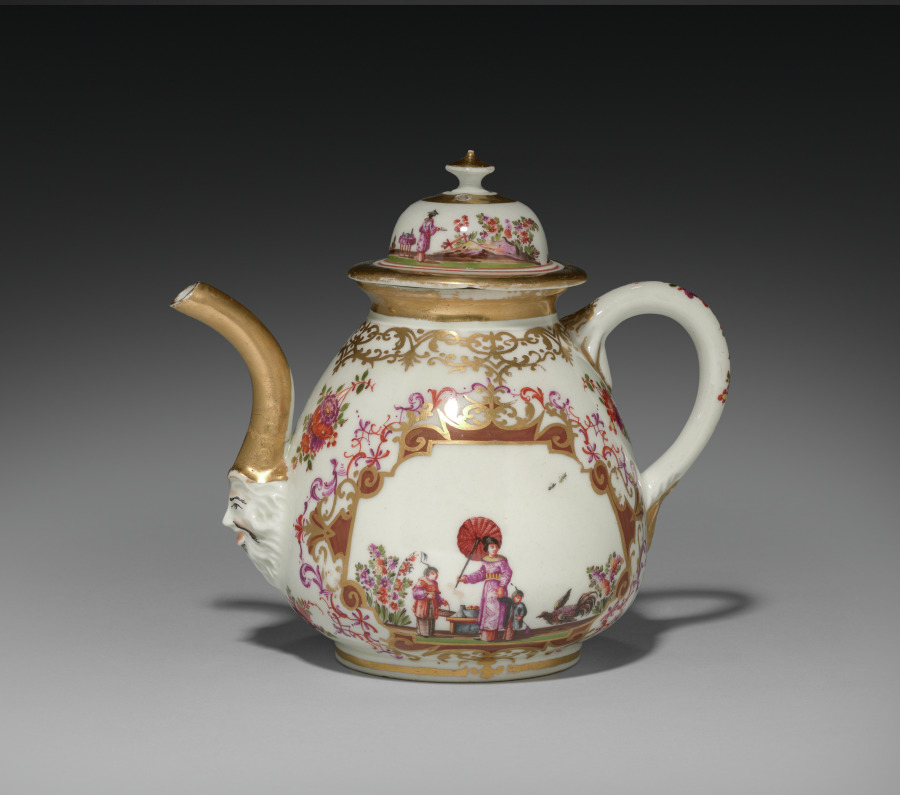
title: Tea Pot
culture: Germany, Meissen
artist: Meissen Porcelain Factory (German, est. c. 1710)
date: c. 1723–24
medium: gilt porcelain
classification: Ceramic